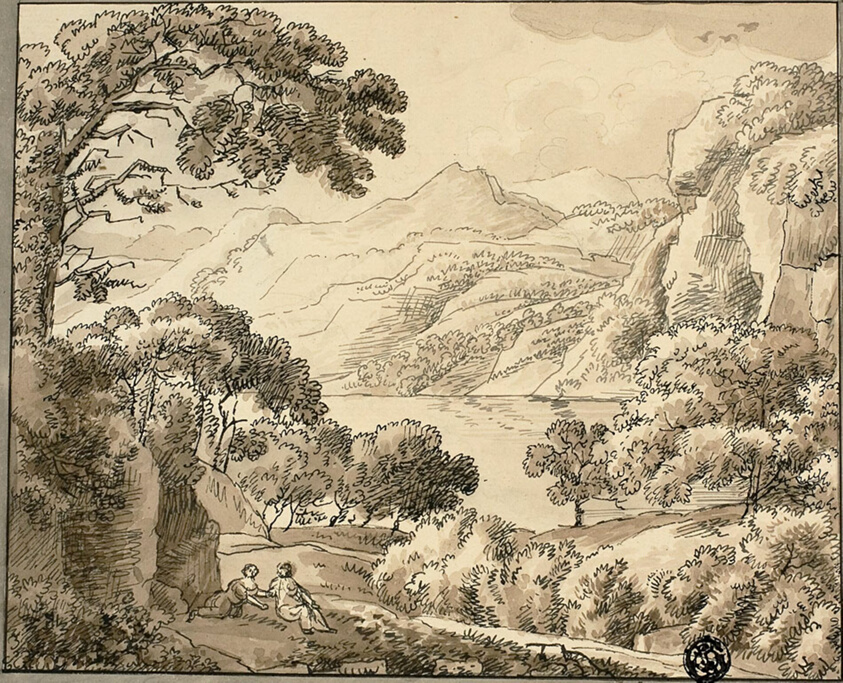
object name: Drawing and Watercolor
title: Mountain Lake with Two Figures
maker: Carl August Lebschée (German, 1800-1877)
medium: Pen and black and gray ink and brush and brown wash, over graphite, on cream laid paper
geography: Germany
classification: pen and ink drawings; drawings (visual works); prints and drawing